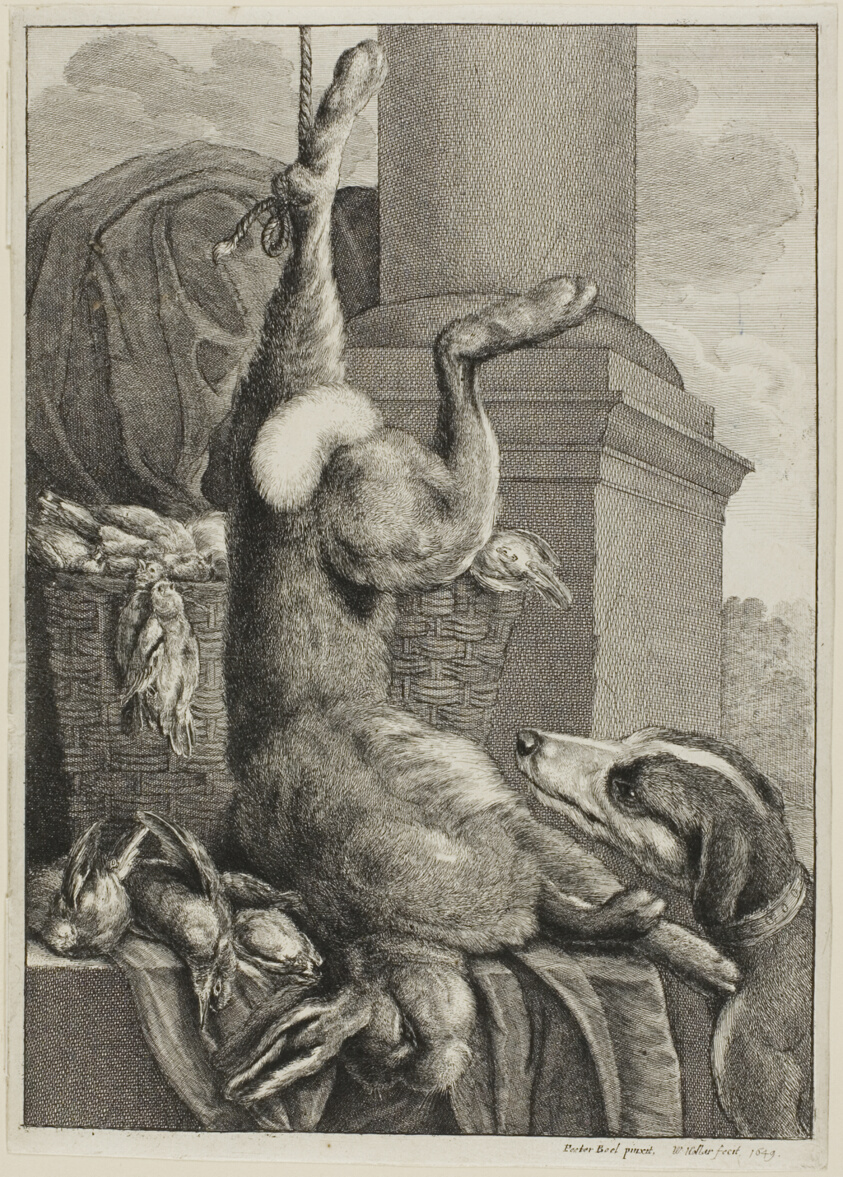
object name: Print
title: Dead Hare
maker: Wenceslaus Hollar (Bohemian, 1607-1677); after Pieter Boel (Flemish, 1622-1674)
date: 1649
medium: Etching in black on ivory laid paper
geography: Bohemia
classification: etching; print; prints and drawing